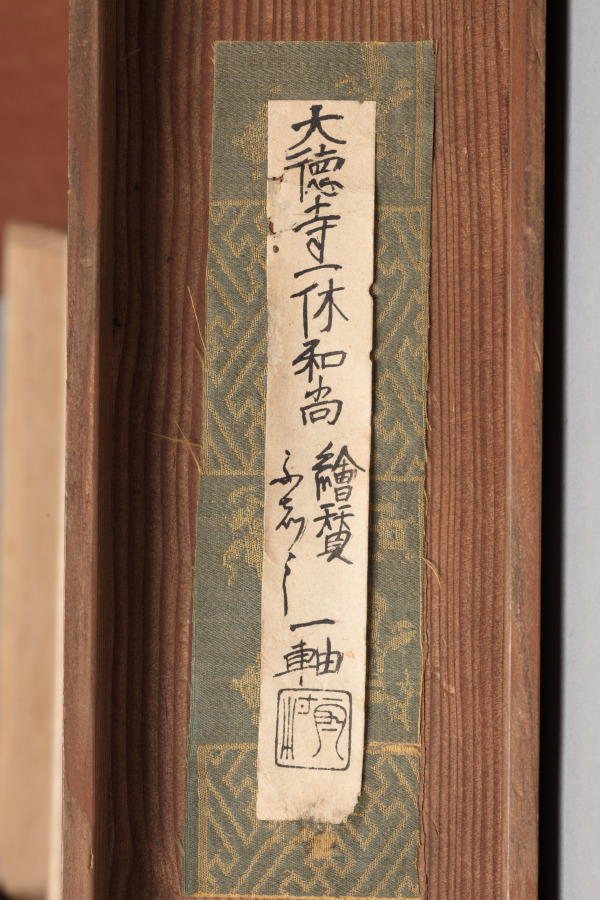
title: Calligraphy with Willow and Swallows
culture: Japan, Muromachi period (1392–1573)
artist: Ikkyū Sōjun (Japanese, 1394–1481)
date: 1400s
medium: hanging scroll, ink on paper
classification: Painting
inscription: How many days has it rid itself of the crow’s cloth? It knows not!/ Lovely is its body so nimble and neat./ Neither men of wealth, courtly position, or power can come close to the unfettered, noble swallow!/ With the coming of spring, it seems to be flying about, dancing around the grass hut of the foolish Priest. signed: Unkasō Isshi Tōkai jun Ikkyū shi ga ippitsu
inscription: outer box inscribed: Ikkyū Ōshō Enshi-zu Jigasan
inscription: inner box side lid inscribed: Showa 50 (1975), November by Tayama Honan with kao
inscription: Inner box side lid inscribed: Ikkyū Ōshō Bokuseki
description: The famed Buddhist monk Ikkyū is best remembered for his calligraphy. Calligraphic conventions of his time called for brushwork that did not vary much in style from character to character. However, as Ikkyū’s lines progress, his brushwork wanders between standard script and a sort of shorthand, marked by an uneven distribution of ink and a reduction of the characters to only the most necessary strokes. Ikkyū’s direct communication of emotion via brushwork became characteristic of the works produced by monks affiliated with the temple Daitokuji later in the Edo period (1615–1868).